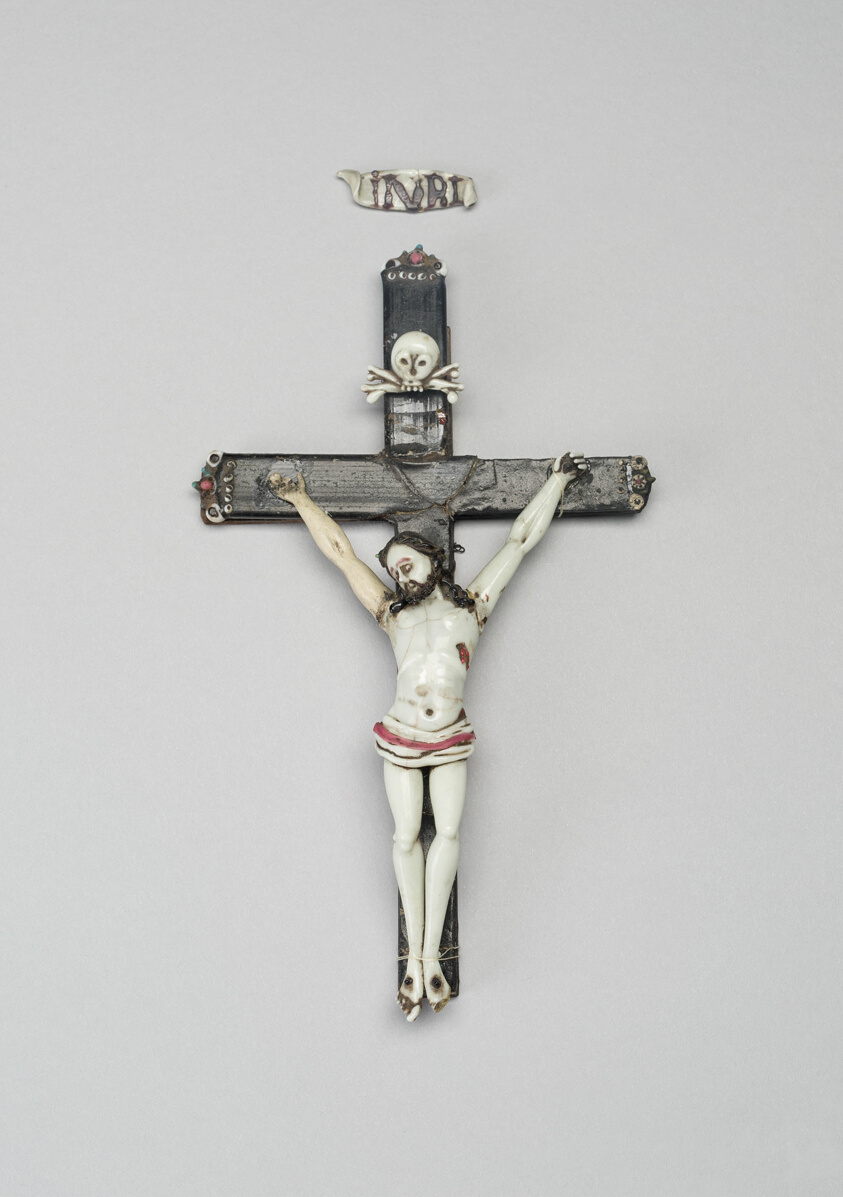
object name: Glass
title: Crucifix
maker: Nevers, France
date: 18th century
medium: Glass; lampwork (verre de Nevers), metal armature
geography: France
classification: glass; miniature; decorative object/ornament; european decorative arts